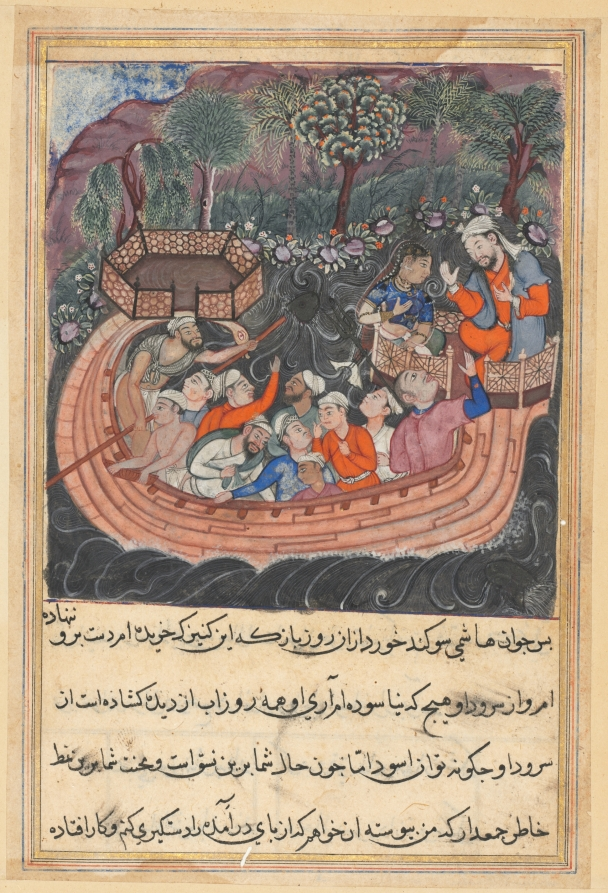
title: The young man of Baghdad reveals his true identity to the Hashimi, from a Tuti-nama (Tales of a Parrot: Forty-eighth Night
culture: Mughal India, court of Akbar (reigned 1556–1605)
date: c. 1560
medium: gum tempera, ink, and gold on paper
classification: Painting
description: At the front of the ship, the young man calls out to the Hashimi, who sits beside the weeping slave girl. Despite their love, the destitute young man had been forced to sell the girl. She is overjoyed to see her long-lost lover and begins to sing so beautifully that the birds, fish, and the ocean itself join in the celebration.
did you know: Two black fish are visible in the swirling waters of the ocean.